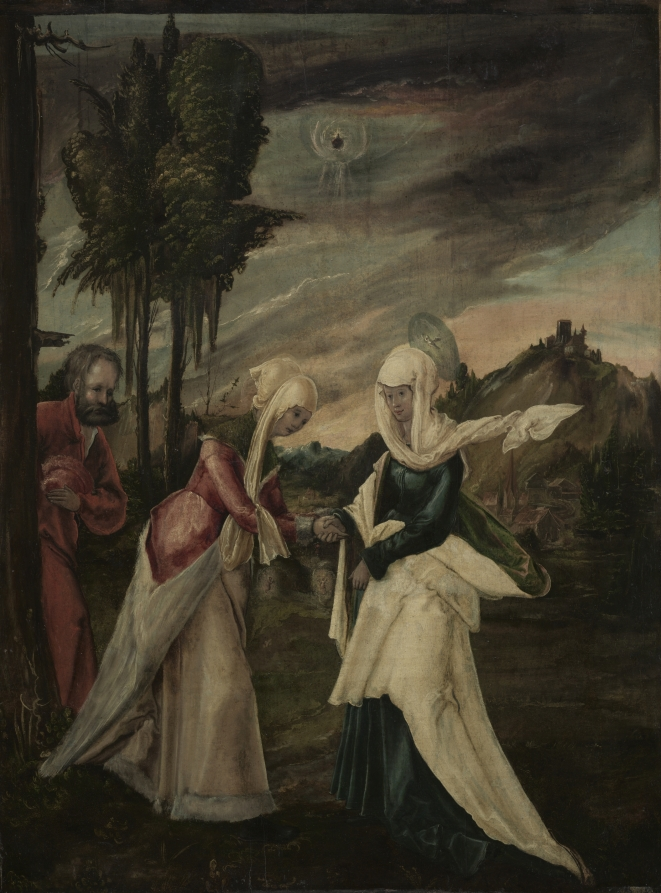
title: The Visitation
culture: Germany, Danube School, 16th century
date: c. 1530–1550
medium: oil on wood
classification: Painting